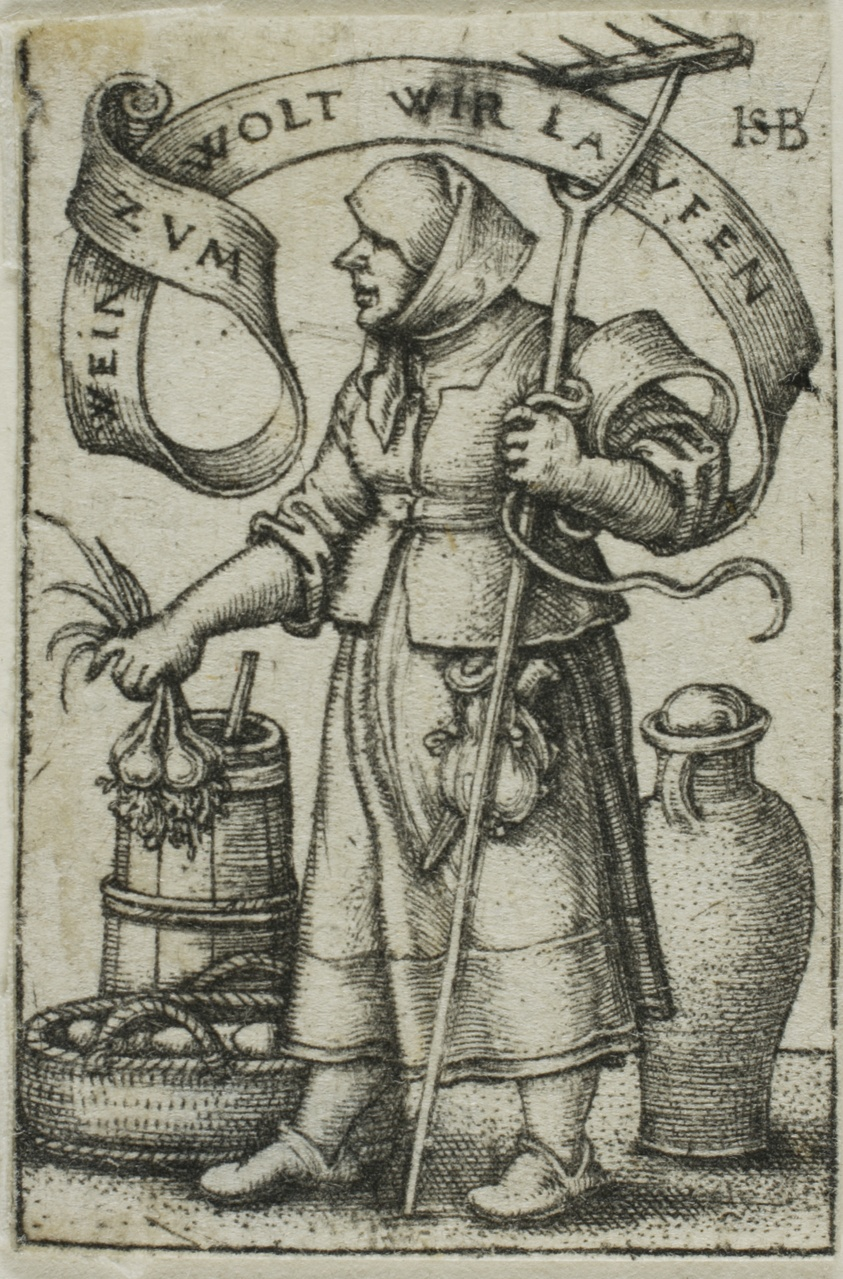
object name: Print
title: The Market-Woman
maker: Sebald Beham; German, 1500-1550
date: c. 1542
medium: Engraving in black on ivory laid paper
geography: Germany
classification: engraving; print; prints and drawing